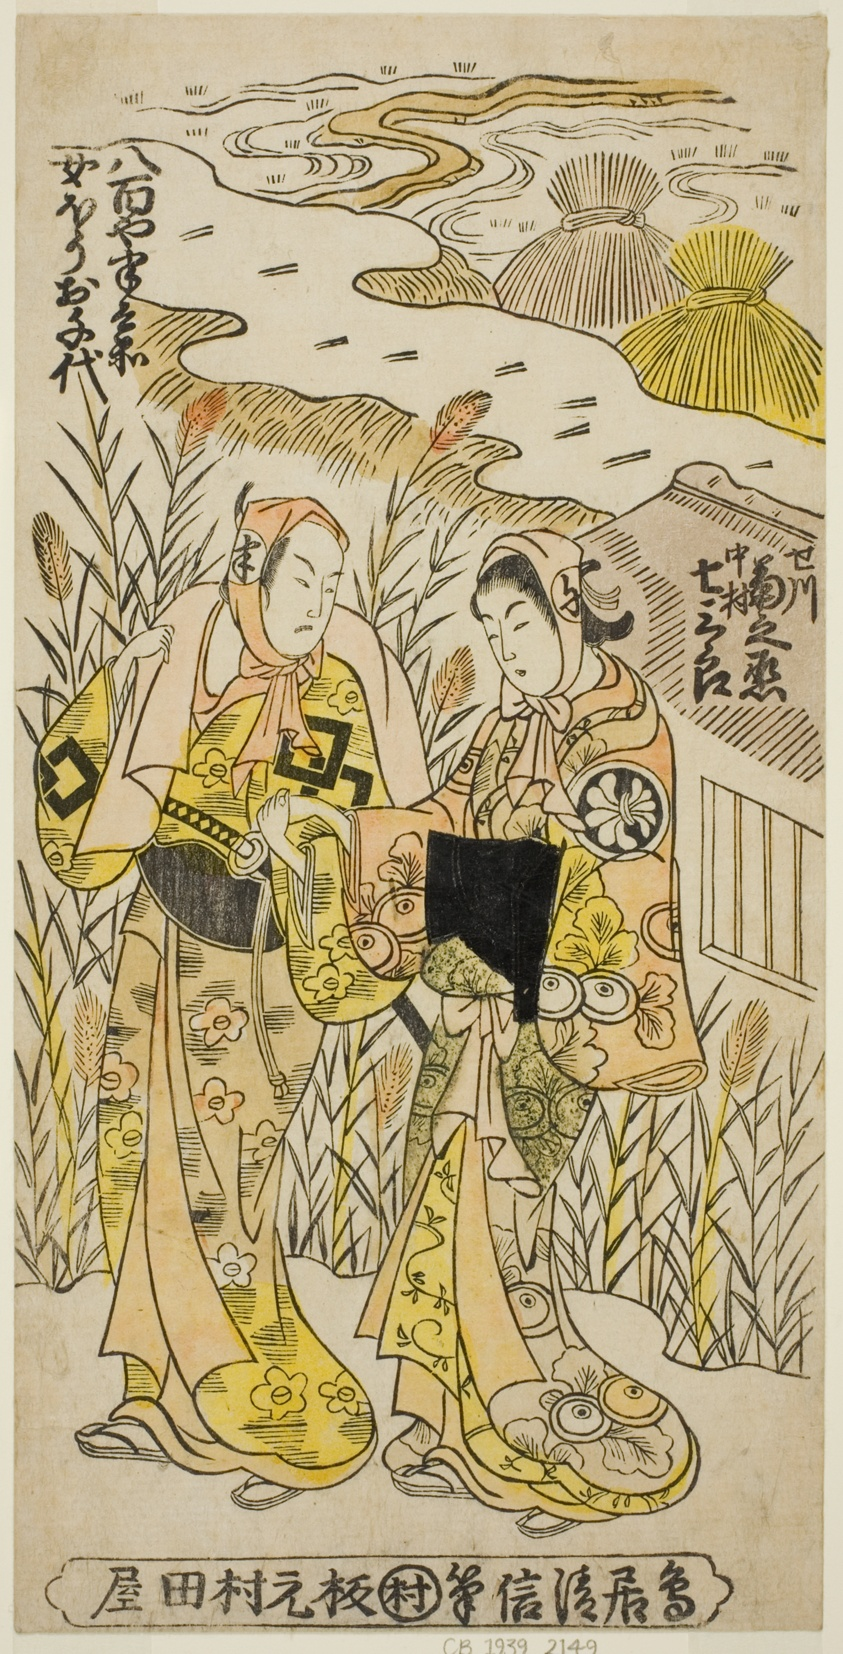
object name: Print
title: The Actors Segawa Kikunojo I as Ochiyo and Nakamura Shichisaburo II as Hanbei in the play "Higashiyama Gojitsu Yaoya Hanbei," performed at the Nakamura Theater in the eighth month, 1744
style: Japanese (culture or style)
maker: Torii Kiyonobu II (Japanese, active c. 1725-61)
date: 1744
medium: Hand-colored woodblock print; hosoban, urushi-e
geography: Japan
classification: woodblock print; print; asian art